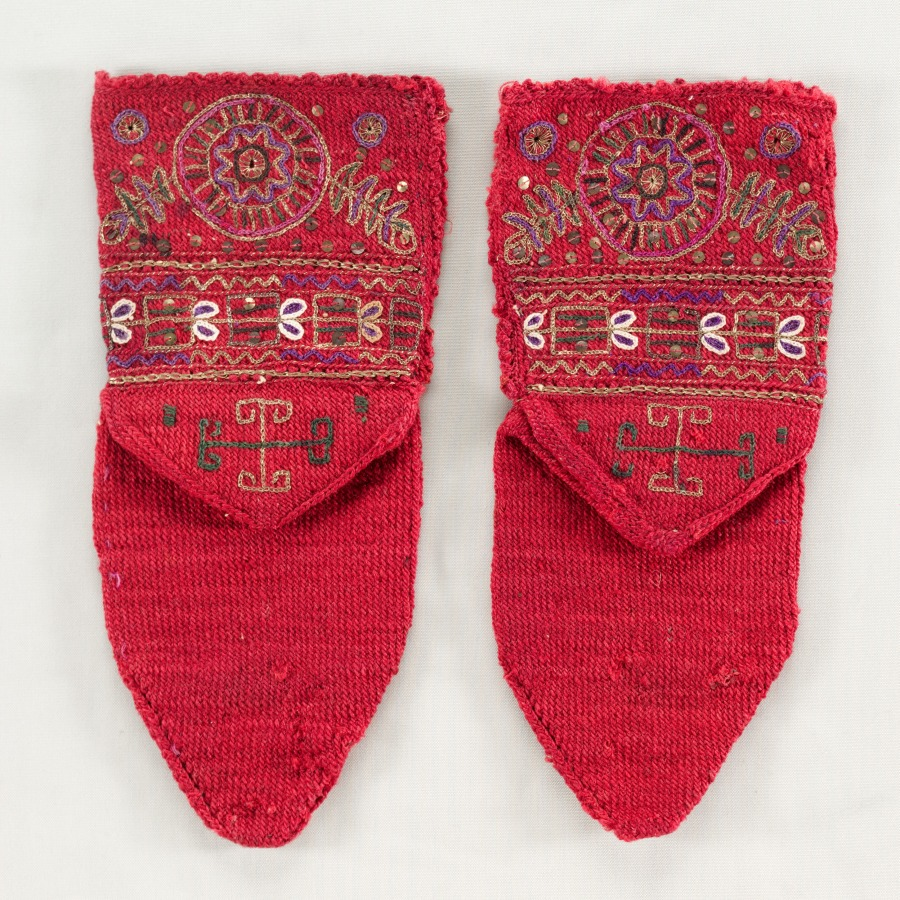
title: Woman's Bridal Socks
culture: Yugoslavia, Serbia, 20th century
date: early 1900s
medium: embroidered wool, gold thread, sequins, knitting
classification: Knitting